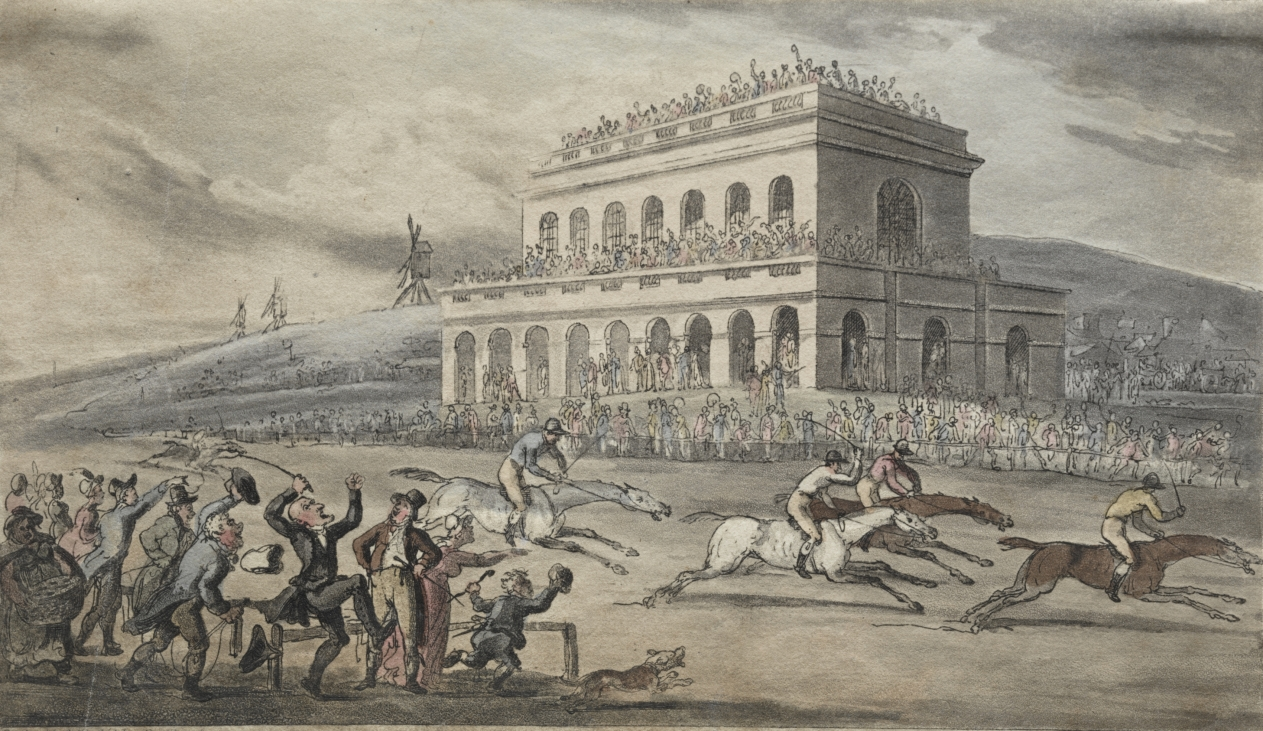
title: The Rev. Dr. Syntax Loses his Money on the Raceground at York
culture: England, late 18th-early 19th century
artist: Thomas Rowlandson (British, 1756–1827)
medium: etching, hand colored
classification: Print